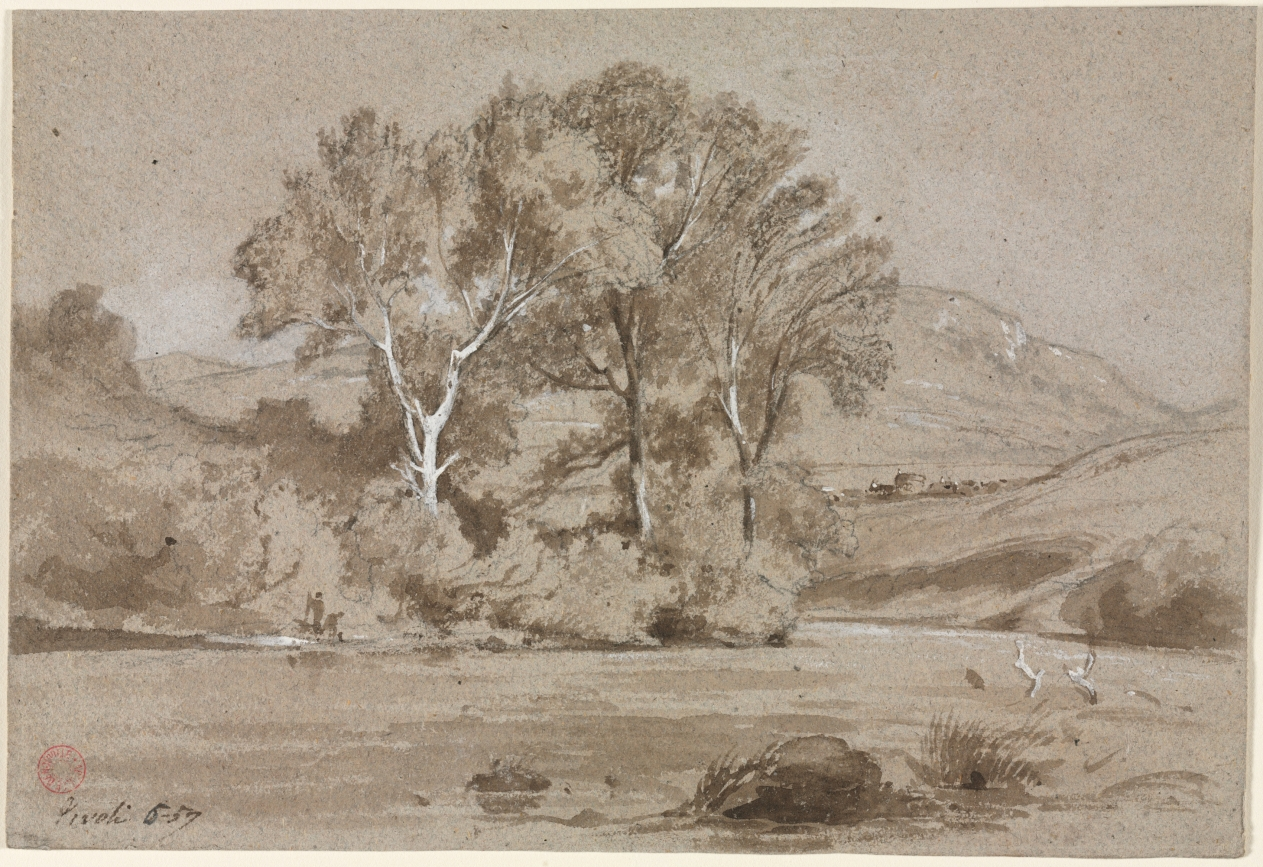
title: View Near Tivoli (Vue prise à Tivoli)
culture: France, 19th century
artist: Jean Achille Benouville (French, 1815–1891)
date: 1857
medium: brown wash (with point of brush work) with gray wash and graphite, heightened with white (paint/gouache)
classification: Drawing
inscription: Inscribed in brown ink lower left: Tivoli 5-57 Verso: Inscribed on right in white chalk: 1274978